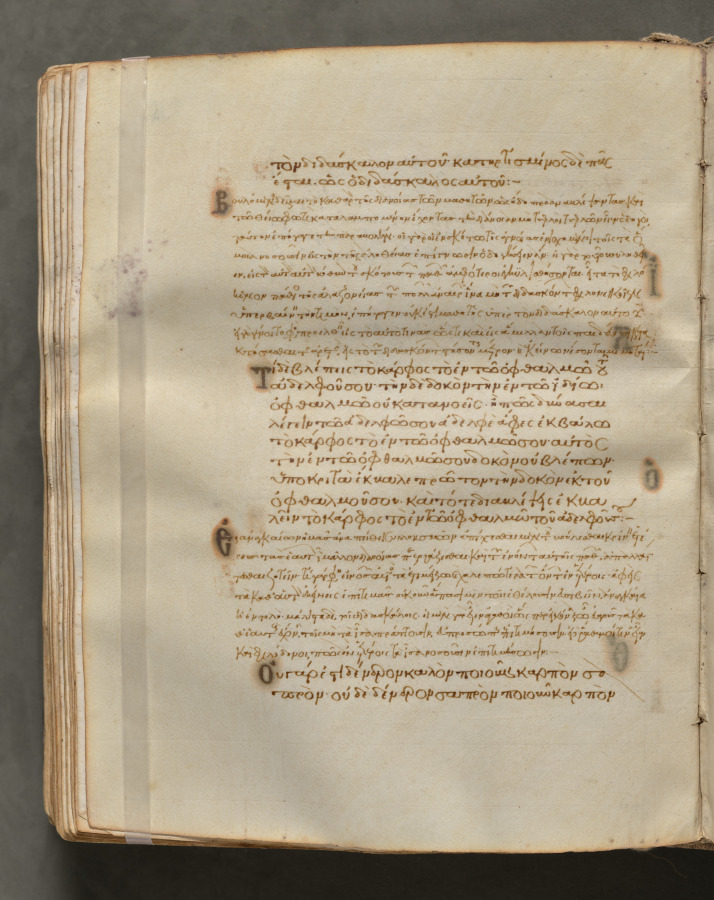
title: Text, folio 230 (verso), from a Gospel Book with Commentaries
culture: Byzantium, Constantinople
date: c. 1000–1100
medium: ink, tempera, and gold on vellum; leather binding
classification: Bound Volume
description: Each of the four gospels in this book opens on a page with brilliantly illuminated borders depicting the author of the text as well as birds—principally peacocks, symbols of the immortality of the soul—and fountains, representing the fountain of life and the salvation of the soul. This volume consists of 428 leaves with texts in Greek. Its level of sophistication suggests that it was probably written and decorated in a monastery in Constantinople.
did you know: Gospel books were carried in procession through Byzantine churches.